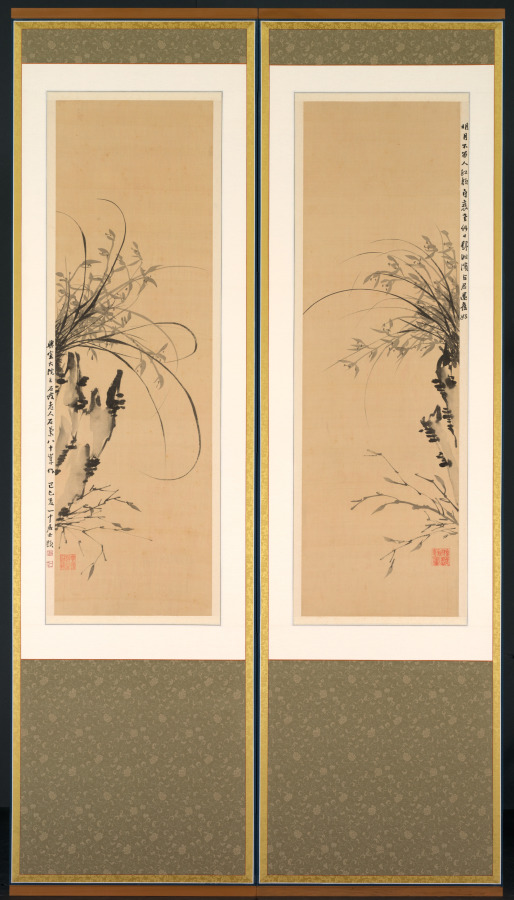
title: Orchids and Rocks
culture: Korea, Joseon dynasty (1392–1910)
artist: Yi Ha-eung (Korean, 1820–1898)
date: 1897–98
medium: Eight-panel folding screen; ink on silk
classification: Painting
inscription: Translation: [I] painted for the high minister Yangwon. [I] humbly request your corrections and advice [on my painting]. [By] an eighty-year old gentleman of rocks.)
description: Yi Ha-eung (1820−1898), the artist of this eight-panel folding screen, was one of the most influential men in late 19th-century Korea. Acting as the regent for his son, King Gojong (1852−1919), who ascended the throne at the age of thirteen, Yi ruled Korea from 1866 to 1873. In addition to his illustrious political career, Yi was also recognized as one of the most celebrated artists who led the revival of literati art in late 19th-century Korean art. In particular, he was recognized as the master of orchids, one of the “Four Gentlemen” (plum, orchid, chrysanthemum, and bamboo) themes. Solely relying on monochrome ink, Yi depicted the curvilinear silhouettes of cymbidium orchid leaves dramatically hanging down from cliffs. Growing in wilderness and redolent with fragrance, orchids were often associated with the perseverance of principled gentlemen, and thus became one of the most popular subjects of scholar-artists' paintings.On the upper right corner of the far left panel, Yi wrote a short inscription stating that he painted the work at the age of 80.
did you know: The artist of this elegant painting is the formidable politician Yi Ha-eung (1820–1898), who is known for a seclusion policy that aimed to protect Korea and its sovereignty from foreign influences.